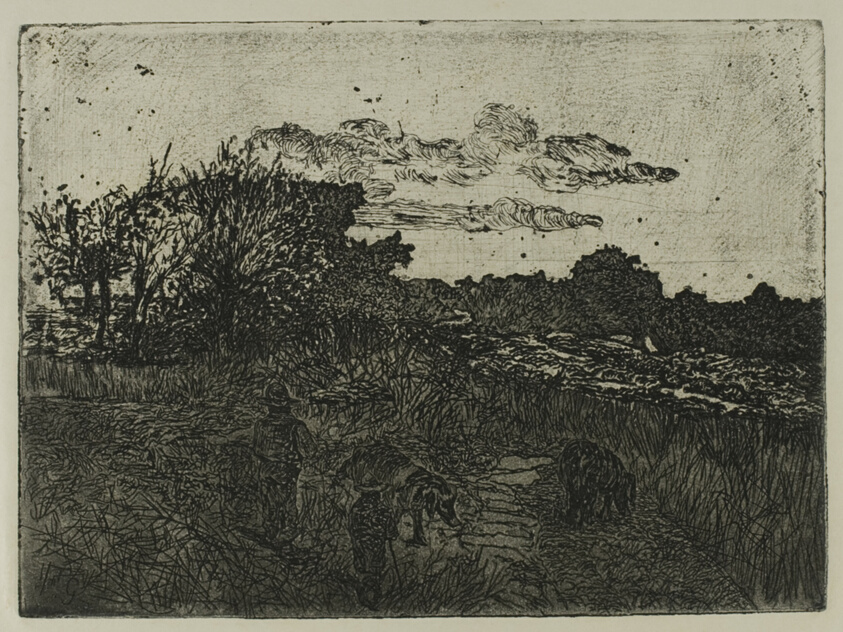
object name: Print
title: Country at Sunset with Swineherds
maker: Giovanni Fattori (Italian, 1825-1908)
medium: Soft ground etching, with aquatint, in black on ivory wove paper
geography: Italy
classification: etching; paper; print; prints and drawing